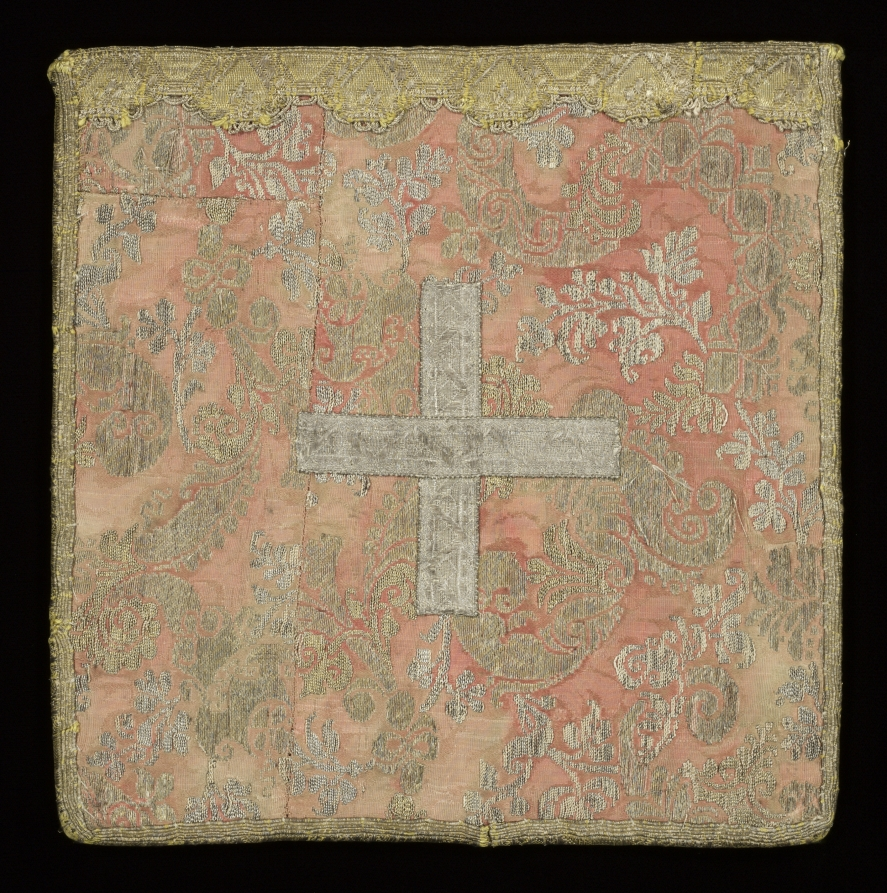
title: Burse (Corporal Case)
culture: Italy, Venice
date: second half of 18th century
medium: silk satin damask, brocaded; silk, silver and gold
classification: Textile